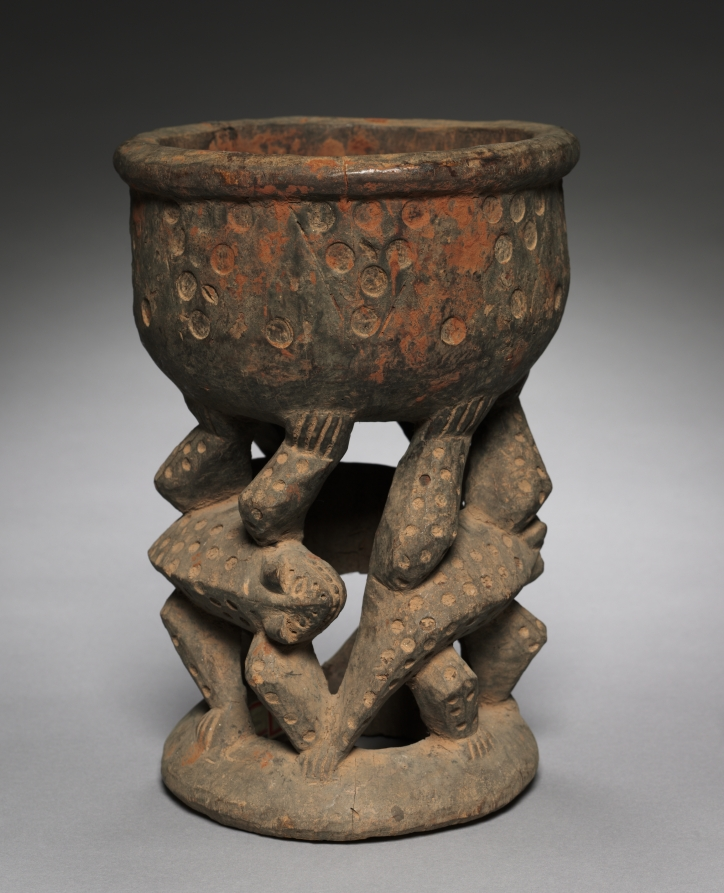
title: Stand or Bowl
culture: Africa, Central Africa, Cameroon, unknown maker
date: early 1900s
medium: Wood and organic materials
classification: Sculpture